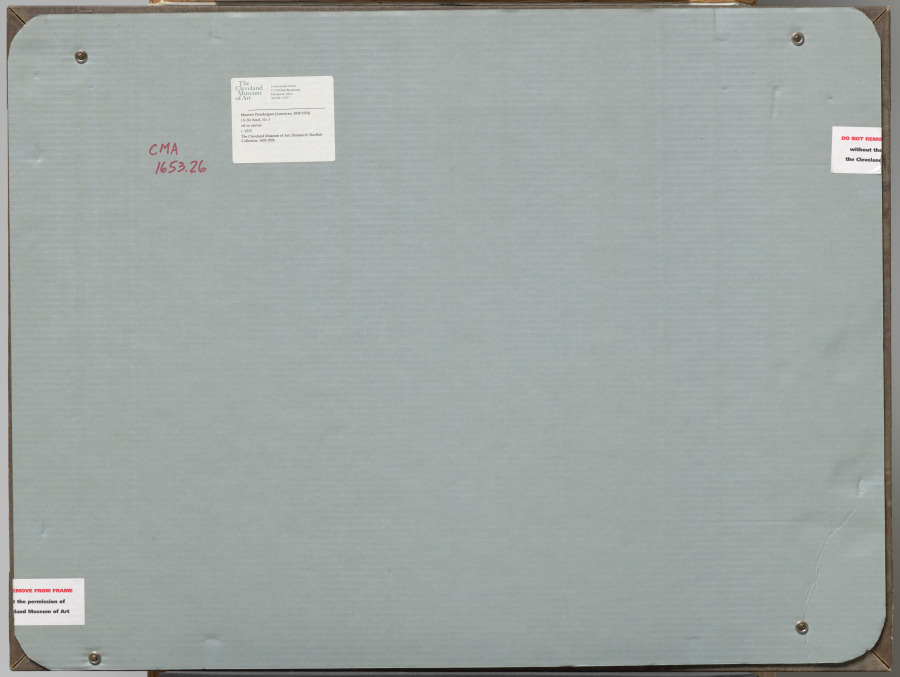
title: On the Beach, No. 3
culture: America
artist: Maurice Prendergast (American, born Newfoundland [now Canada], 1858–1924)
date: c. 1915–18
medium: oil on canvas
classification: Painting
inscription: signed lower left: Prendergast; annotated on verso, "The Beach."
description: Prendergast developed a distinctive painting style featuring rounded patches of thickly applied color. Like many of his works, On the Beach, No. 3 visually approximates a densely woven tapestry.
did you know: Three modes of transportation appear in this composition: a ship, horse, and donkey cart.